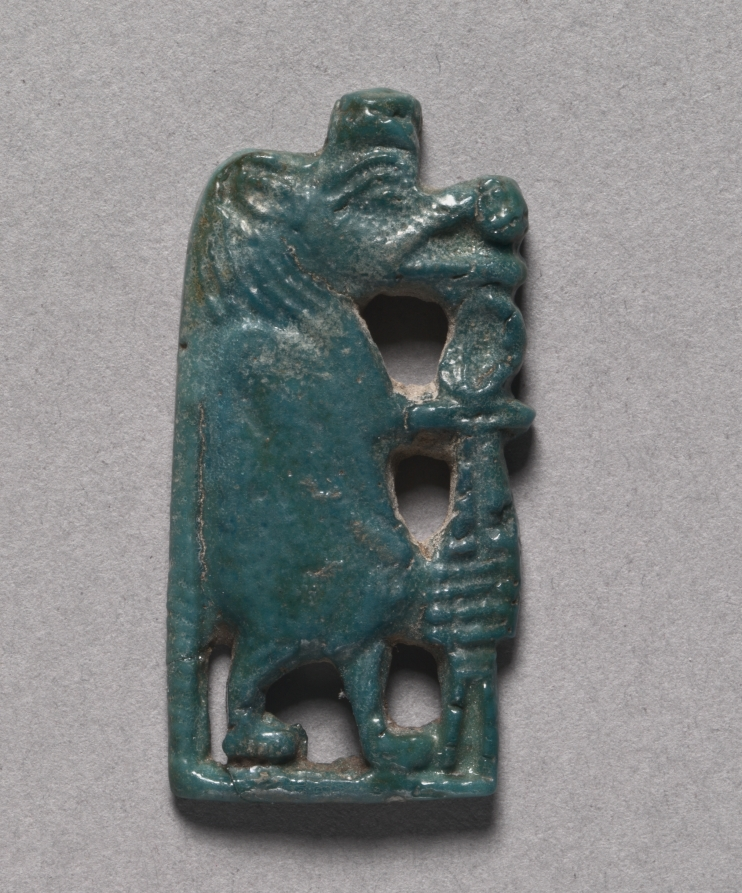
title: Amulet of Taweret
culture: Egypt, New Kingdom (1540–1069 BCE), Dynasty 18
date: 1540–1296 BCE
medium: deep turquoise green faience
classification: Amulets